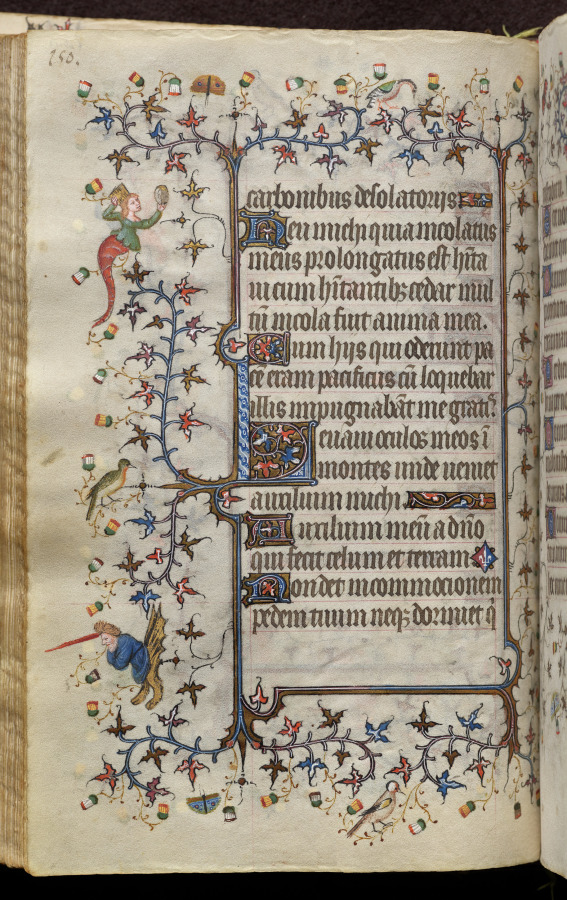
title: Hours of Charles the Noble, King of Navarre (1361-1425): fol. 75v, Text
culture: France, Paris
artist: Master of the Brussels Initials and Associates (French)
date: c. 1405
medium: ink, tempera, and gold on vellum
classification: Bound Volume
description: This precious volume was obviously highly prized by its owner, the French-born King of Navarre, who had his coat of arms painted on no less than twenty folios. Rather than directly commissioning this manuscript from a specific workshop, it seems that Charles the Noble acquired his book of hours -- perhaps ready-made for the luxury market -- while on a trip to Paris in 1404-05. A collaborative effort, six painting styles are evidenced within the pages of this codex, those of two Italians, two Frenchmen, and two Netherlanders. The painter who was responsible for the planning and decoration of the book, and who produced seventeen of the large miniatures, was a Bolognese artist known as the Master of the Brussels Initials. His principal assistant, responsible for most of the borders, was a Florentine who signed his name "Zecho" da Firenze on folio 208 verso.